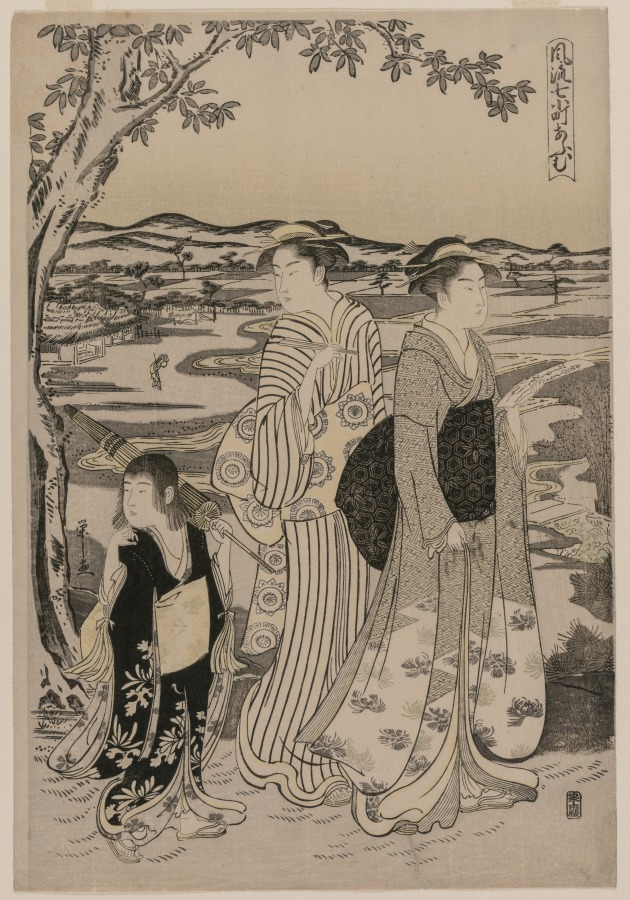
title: Omu the Parrot (from the series Seven Elegant Episodes from the Life of the Poetess Ono no Komachi)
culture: Japan, Edo period (1615–1868)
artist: Chōbunsai Eishi (Japanese, 1756–1829)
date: c. 1790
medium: color woodblock print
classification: Print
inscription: Signature: Eishi ga